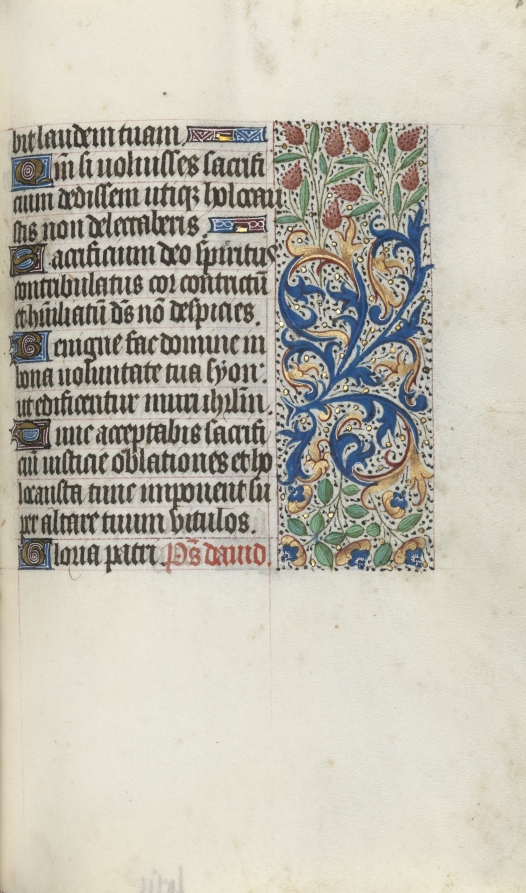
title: Book of Hours (Use of Rouen): fol. 87r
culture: France, Rouen, 15th century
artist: Master of the Geneva Latini (French, active Rouen, 1460–80)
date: c. 1470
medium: ink, tempera, and gold on vellum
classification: Bound Volume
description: In the late 1400s and early 1500s Rouen was an established and important center of book production. The city’s cathedral had a wealthy chapter that spent large sums of money to commission books and to maintain its extensive library. The stationers and booksellers would have likely been concentrated in or near the cathedral precinct. This artist, named after a manuscript now in Geneva, was Rouen’s principal illuminator during the second half of the 1400s.